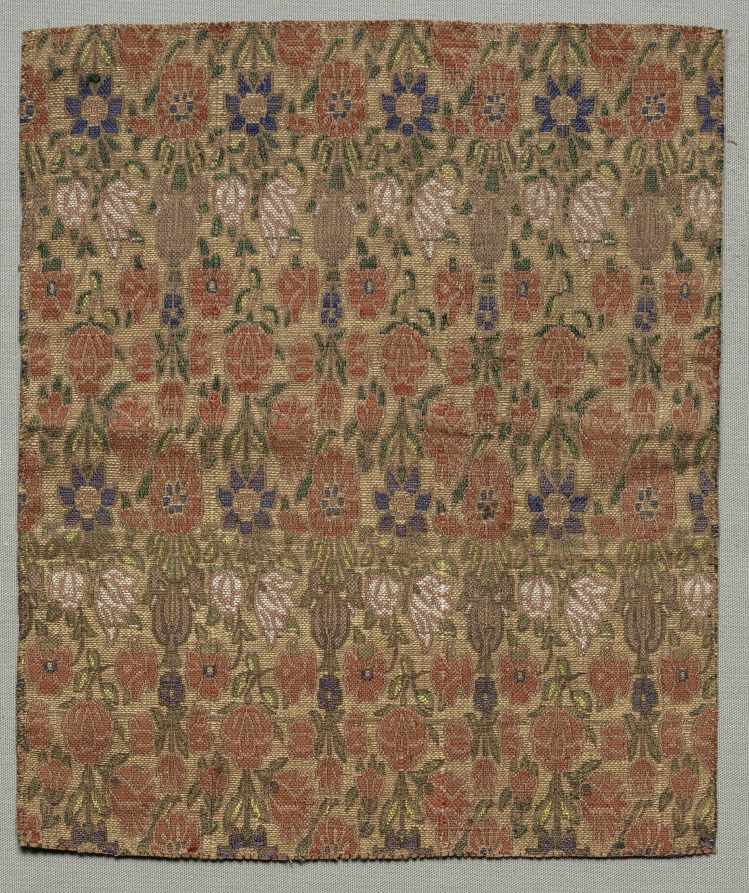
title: Fragment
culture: Iran, 18th century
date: 1700s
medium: lampas weave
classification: Textile